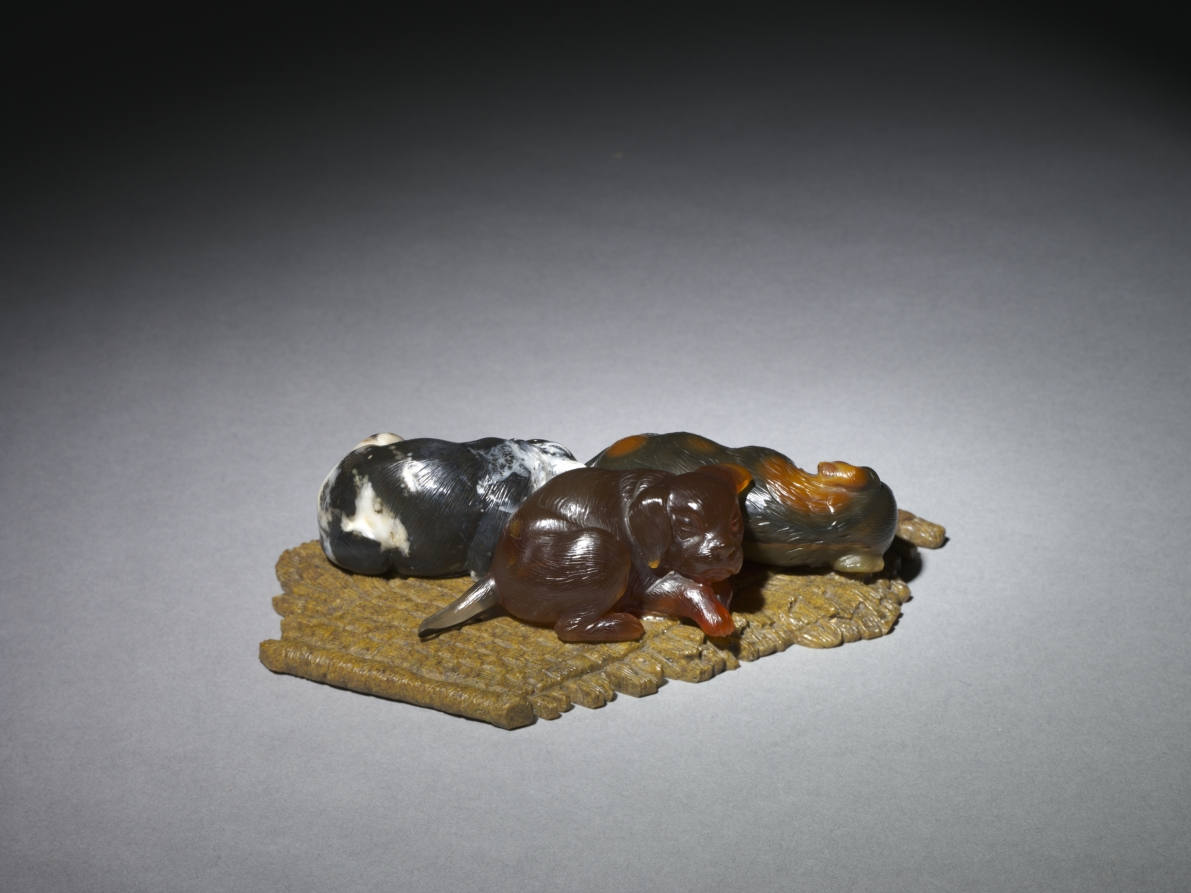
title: Sleeping Puppies on a Mat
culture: Russia, St. Petersburg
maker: House of Fabergé (Russian, 1842–1918)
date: c. 1895–1915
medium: agate, chalcedony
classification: Miscellaneous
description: In creating luxurious accessories for a desk or tabletop, Fabergé often used native hardstones such as multicolored agate and jasper, green nephrite, pink rhodonite, and rock crystal found in the Ural Mountains of western Russia. By paying careful attention to the unique colors and textures of the stones, Fabergé and his craftsmen brought them to life, turning milky agate into a begging poodle or brown and black jasper into these sleeping puppies. The use of native materials also promoted Russian nationalism, which appealed greatly to the tsar and his family.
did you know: Fabergé's artisans used multiple types of stone to make each puppy unique. Even the little rug they are sleeping on is made of stone.